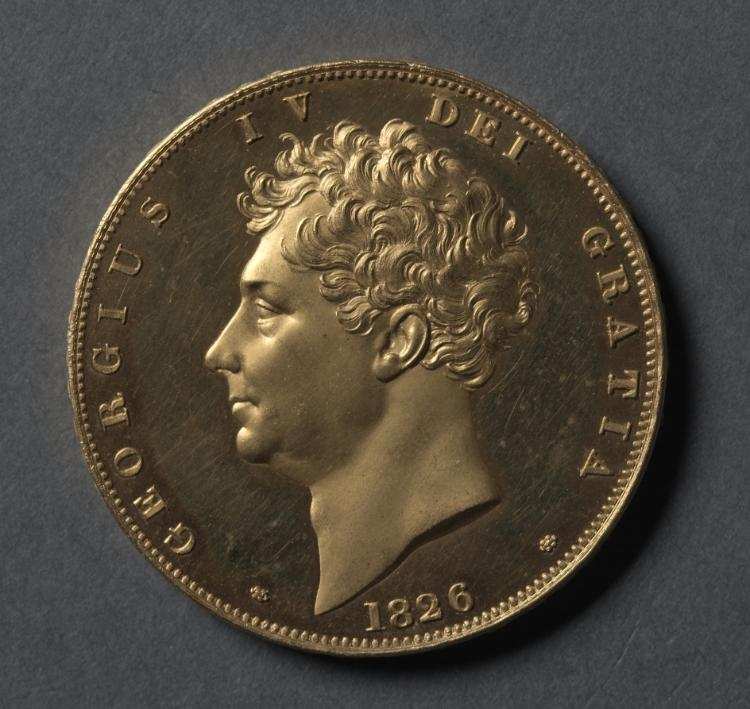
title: Five Pound Piece: George IV (obverse)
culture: England, George IV, 1820-1830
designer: Jean Baptiste Merlen (French, 1769–1850)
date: 1826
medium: gold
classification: Coins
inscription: DEI GRATIA * 1826 * GEORGIUS IV.